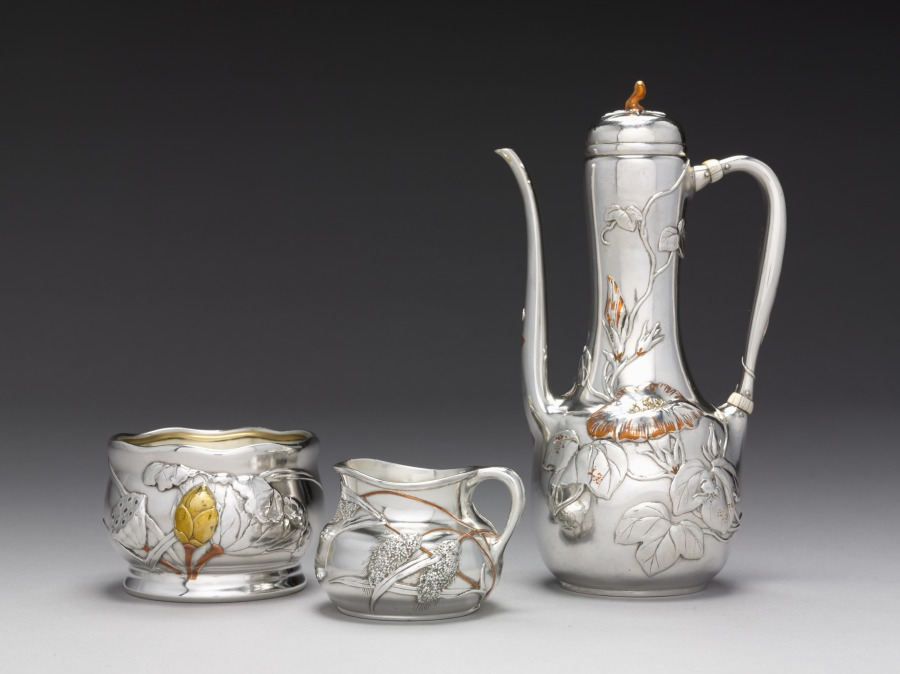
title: Coffee Service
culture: America, New York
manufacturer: Tiffany & Co. (America, New York, est. 1837)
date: c. 1879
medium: silver inlaid with copper and gold, ivory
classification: Silver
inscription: engraved: E.J.W.B./from/A.M./Xmas 1879. (The A.M. may refer to Alfred Morrison, a wealthy man who supported contemporary decorative arts by collecting them for his London house.)